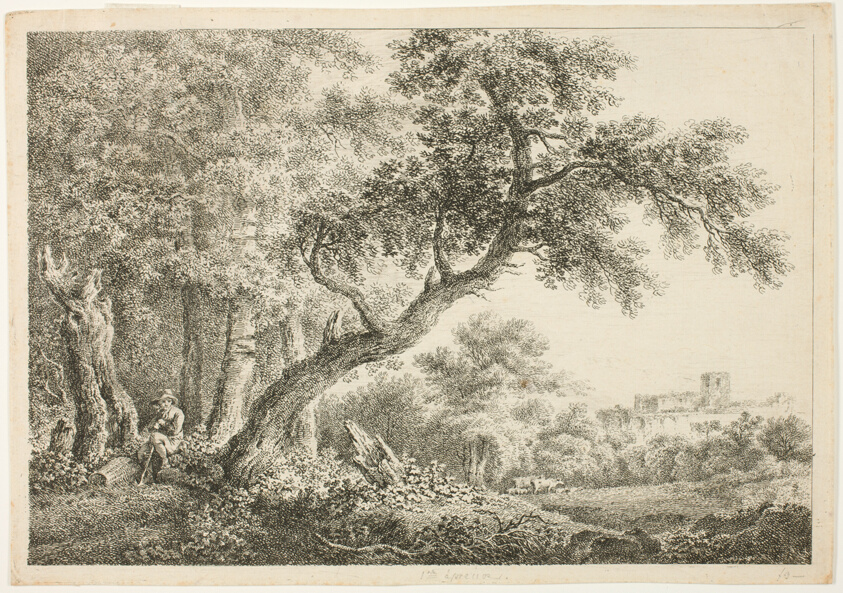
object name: Print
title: Wanderer Resting in the Forest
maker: Martin von Molitor (Austrian, 1759-1812)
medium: Etching on ivory laid paper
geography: Austria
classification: etching; print; prints and drawing